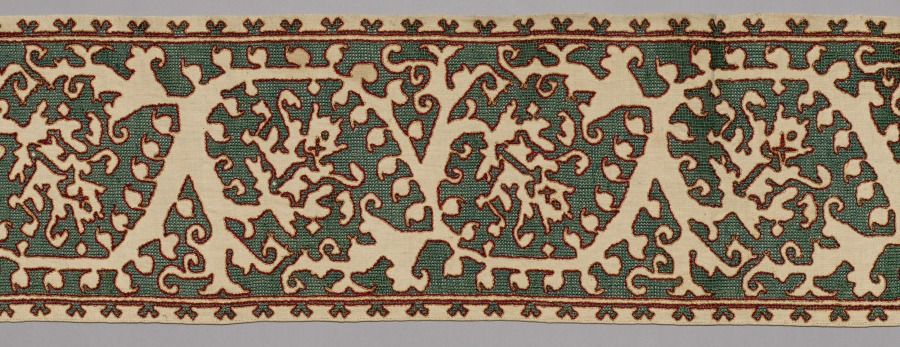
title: Embroidered Strip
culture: Italy, 17th century (copy of)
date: before 1916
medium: Linen: silk and gold filé, embroidery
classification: Embroidery